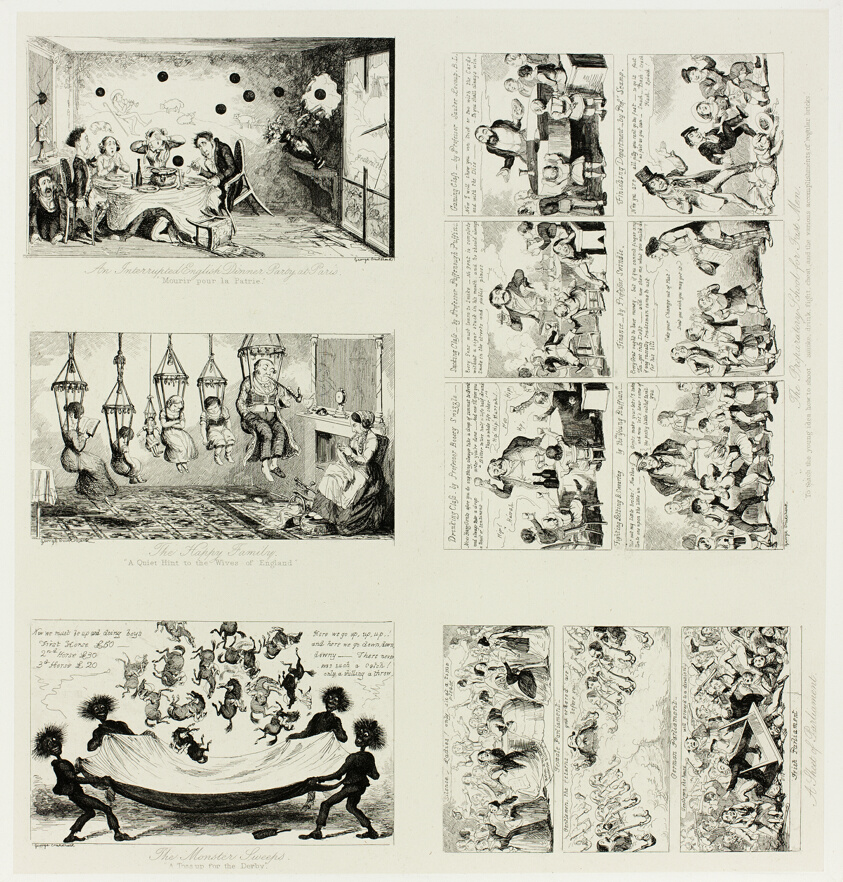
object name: Print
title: An Interrupted English Dinner Party at Paris from George Cruikshank's Steel Etchings to The Comic Almanacks: 1835-1853 (top left)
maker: George Cruikshank (English, 1792-1878); published by Pickering & Chatto (English, 19th century)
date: 1849, printed c. 1880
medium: Five steel etchings in black on cream India paper, laid down on off-white card (chine collé)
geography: England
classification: print; prints and drawing